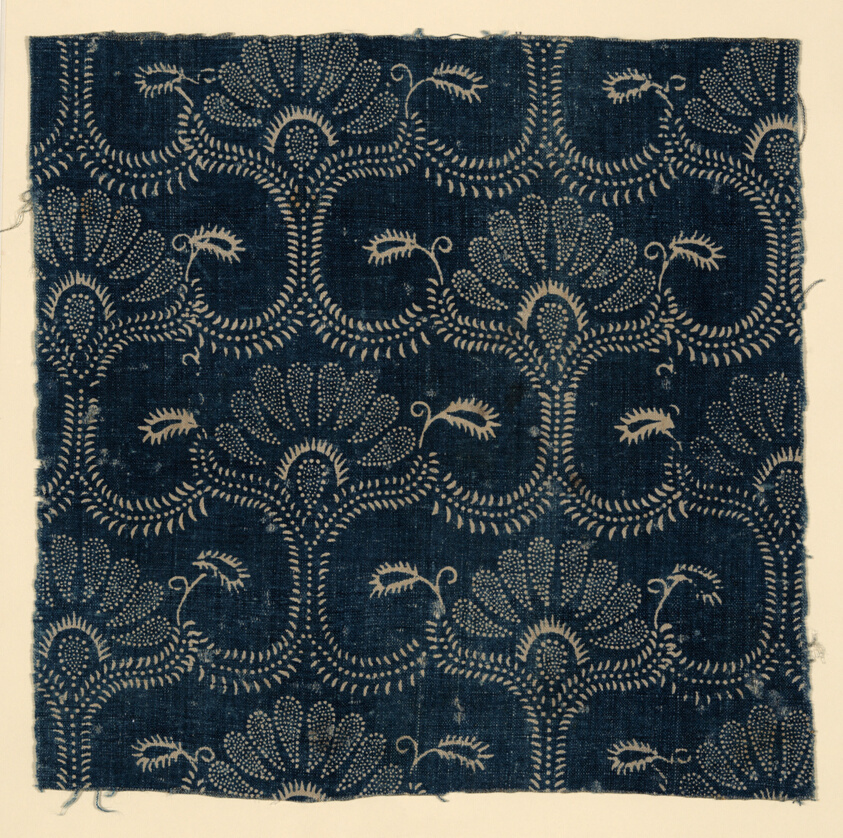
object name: Textile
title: Fragment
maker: Produced by Manufacture Blanc; France, Sain Bel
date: c. 1790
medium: Cotton, plain weave; resist printed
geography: France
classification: textile; weaving; weaving - printed; printed textile